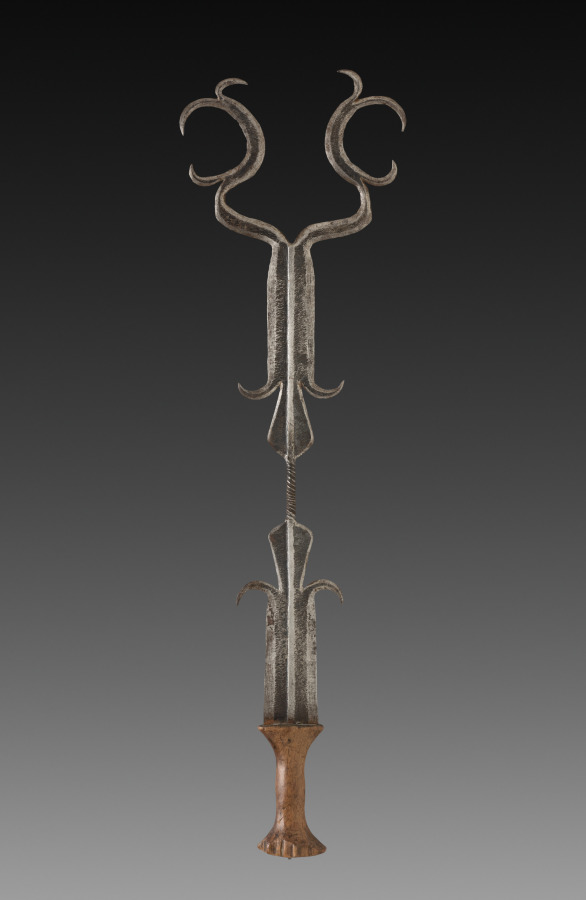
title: Sword (byongi)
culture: Africa, Central Africa, Democratic Republic of Congo, Ekonda-style or Kundu-style maker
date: late 1800s to early 1900s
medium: Iron alloy and wood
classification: Arms and Armor